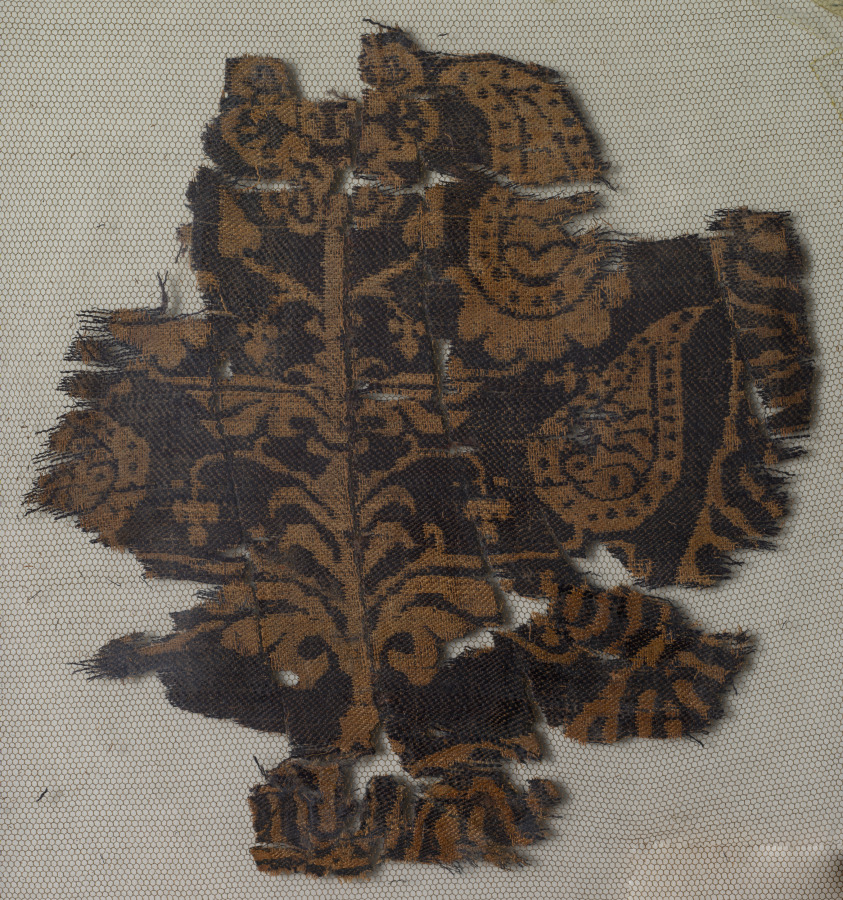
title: Roundel with a Palmette Tree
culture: Syria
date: 600s–700s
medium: silk: compound twill weave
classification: Textile